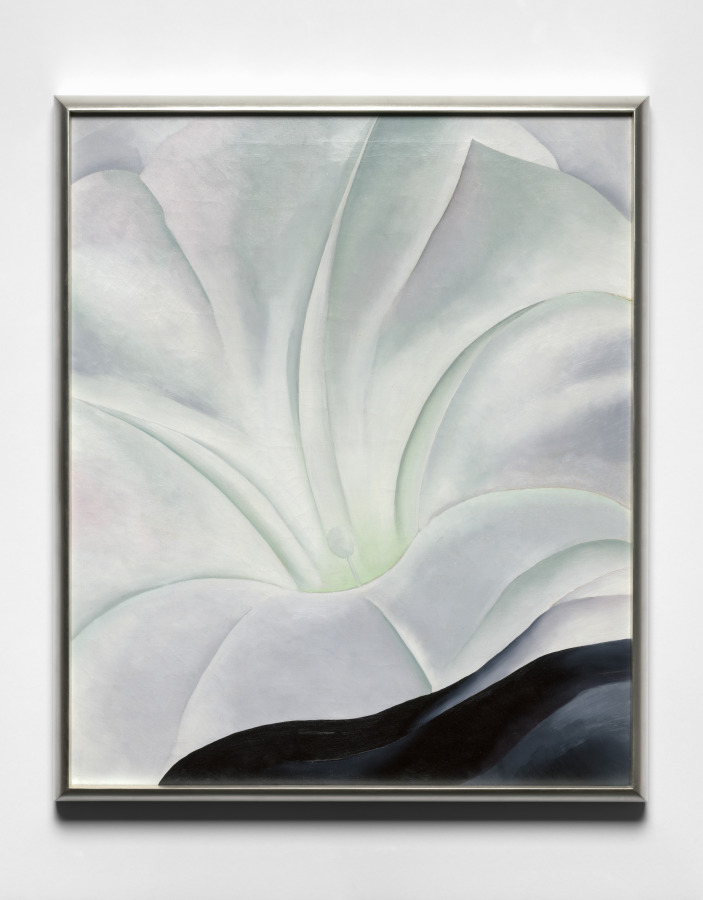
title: Morning Glory with Black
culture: America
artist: Georgia O'Keeffe (American, 1887–1986)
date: 1926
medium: oil on canvas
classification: Painting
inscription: Verso: "G OKeeffe -- 1926" (white paint)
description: O'Keeffe is best known for close-up flower subjects whose magnified forms fill the entire space of each canvas. Likely inspired by similar compositions in modern photography, these images are not only celebrations of nature, but also striking essays in abstract design. Although many critics interpreted O'Keeffe's flower paintings as reflections of femininity in general and female sexuality in particular, the artist strongly opposed such readings. Throughout most of her career, she frequently attempted to persuade others to discuss her work without referring to her gender, writing on one occasion, "I have always been very annoyed at being referred to as a 'woman artist' rather than an 'artist.'"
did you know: The morning glory rests against a black petunia, seen partially at lower right.